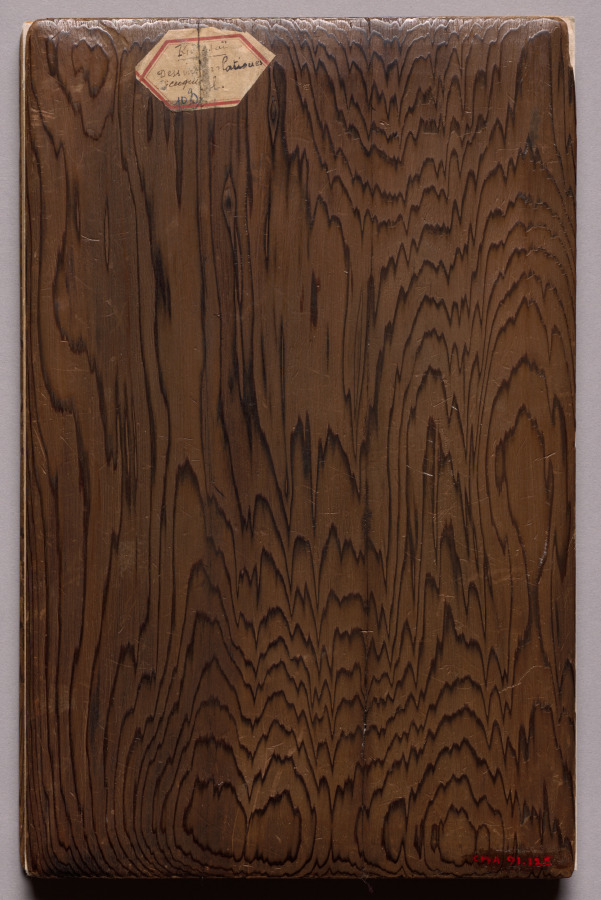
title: Sketch Book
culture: Japan, Edo period (1615–1868) to Meiji period (1868–1912)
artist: Kawanabe Kyōsai (Japanese, 1831–1889)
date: mid- to late 1800s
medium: Accordion-style book of 26 double-leaves; ink and color on paper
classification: Bound Volume